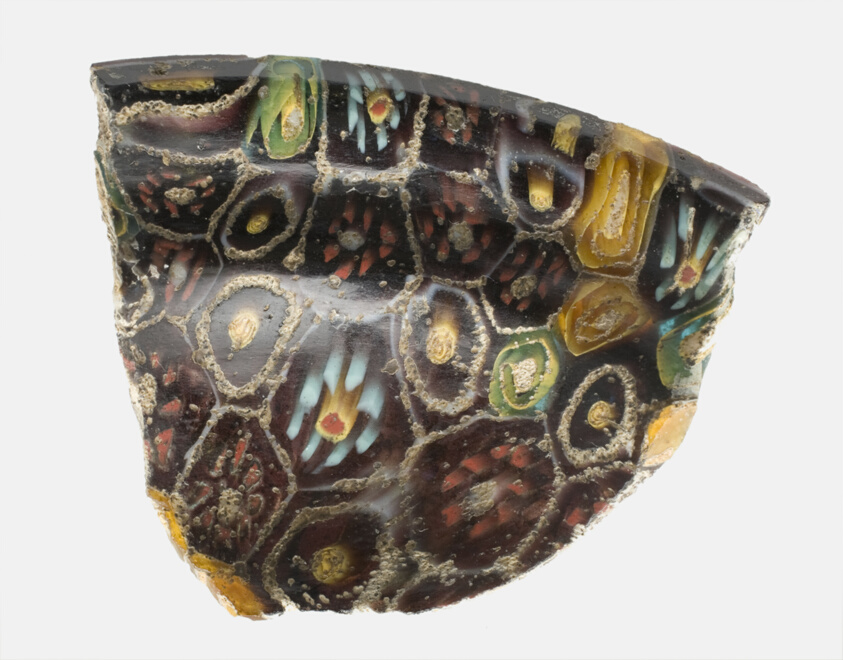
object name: Decorative Arts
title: Fragment of a Cup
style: roman (ancient, style or period), ancient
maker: Roman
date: 1st century BCE–1st century CE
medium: Glass, mosaic glass technique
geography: Eastern Mediterranean Region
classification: fragment; decorative arts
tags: decoration